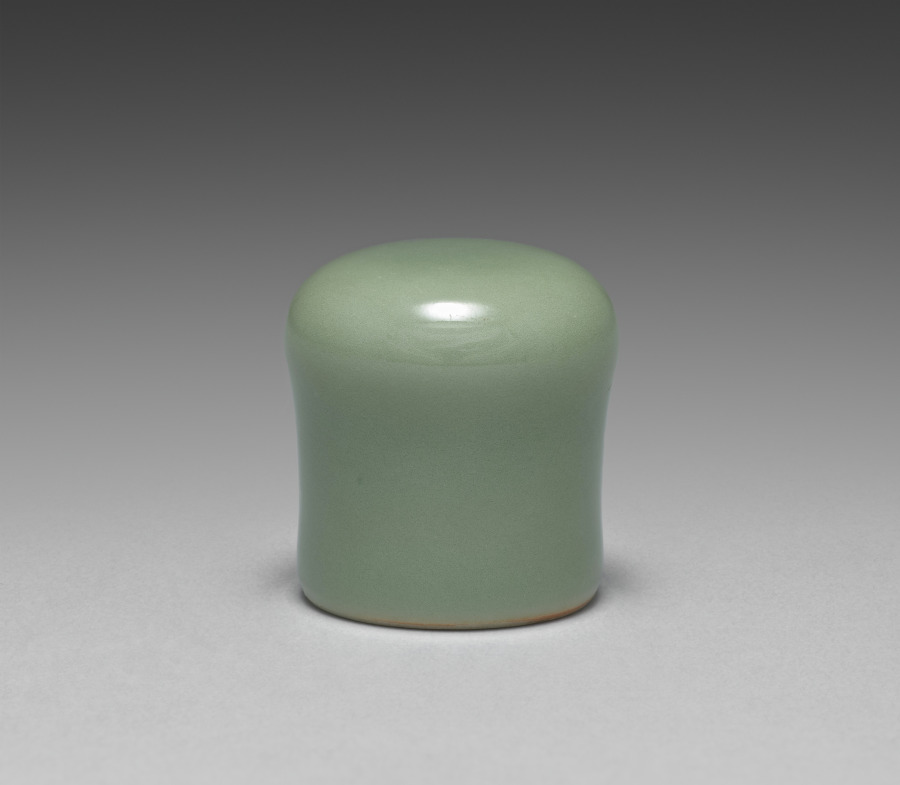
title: Roller End for Hanging Scroll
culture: Japan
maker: Seifū Yohei III (Japanese, 1851–1914)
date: 1893–1914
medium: One of a pair of hanging scroll roller ends; porcelain with celadon glaze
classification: Ceramic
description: Before entering into his apprenticeship with Yohei II, Seifū Yohei III trained as a painter in Osaka. He continued to paint throughout his career as a ceramist. As part of his ceramic practice, Yohei III also made roller ends to be placed at either end of the wooden dowel around which the lower part of a hanging scroll mounting is wrapped. These served both as weights for the painting and as knobs for handling it when rolling and unrolling. The pair here is made of porcelain with a green glaze.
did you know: This is one of two roller ends for the hanging scroll by Seifū Yohei III, Rain Clearing over a Summer’s Mountain, CMA 2022.151.